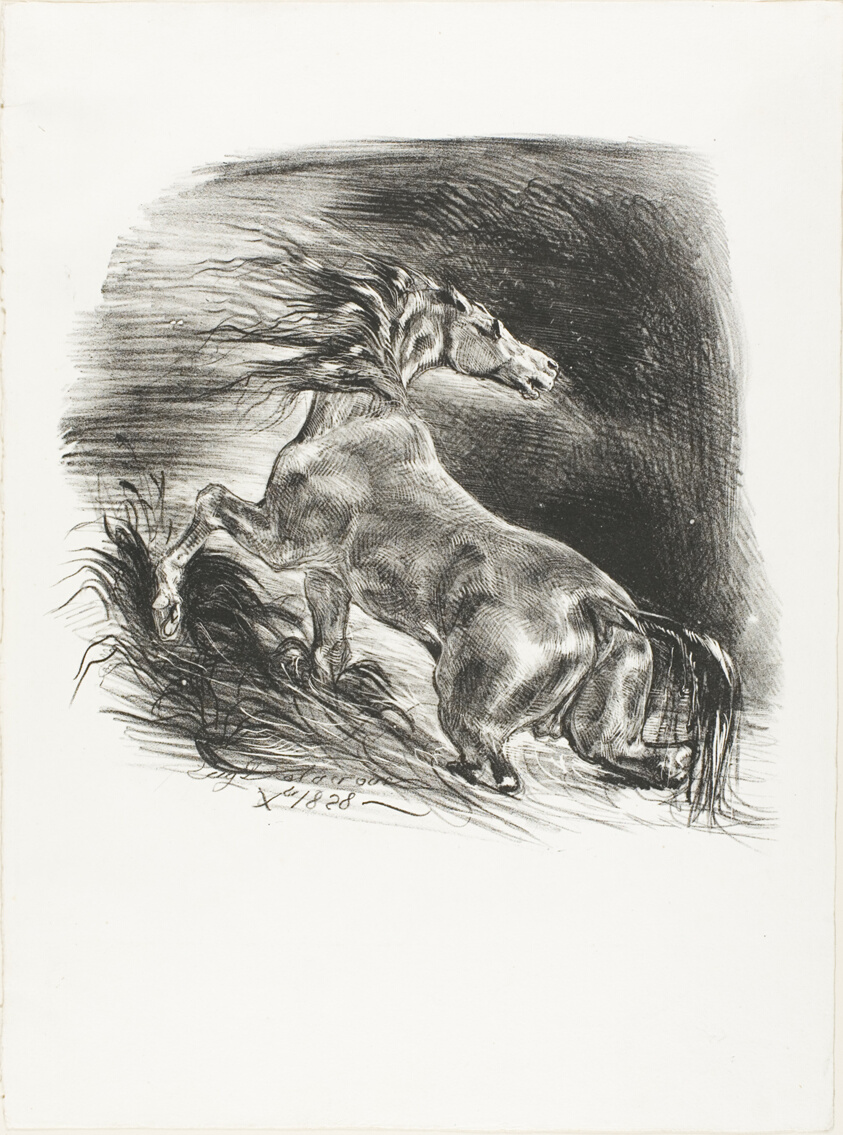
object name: Print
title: Wild Horse, or Frightened Horse Leaving the Water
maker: Eugène Delacroix (French, 1798-1863)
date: 1828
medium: Lithograph, in black, on white wove paper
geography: France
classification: lithograph; print; prints and drawing